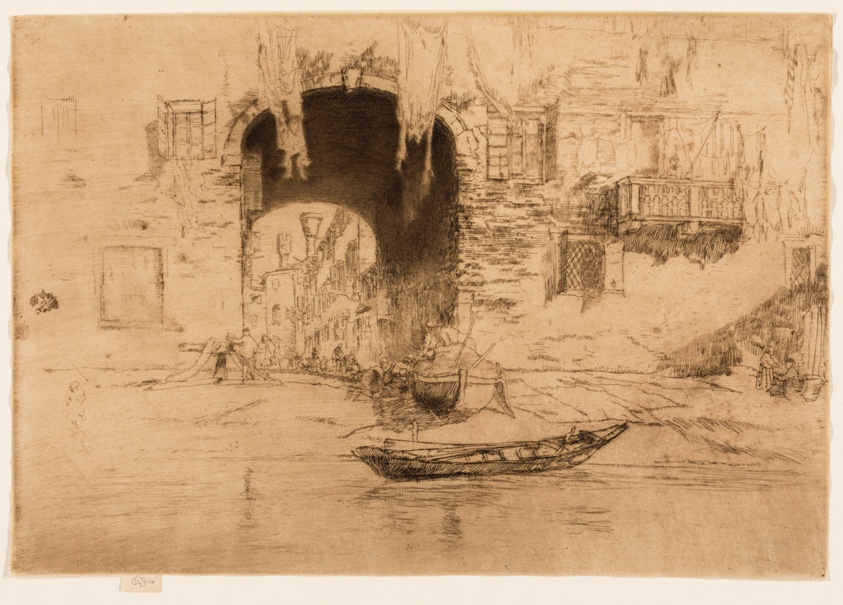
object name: Print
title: San Biagio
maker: James McNeill Whistler (American, 1834-1903)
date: 1880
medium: Etching and drypoint with foul biting in dark brown ink on ivory Asian laid paper altered to tan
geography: United States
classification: etching; drypoint; print; prints and drawing; foul biting; paper